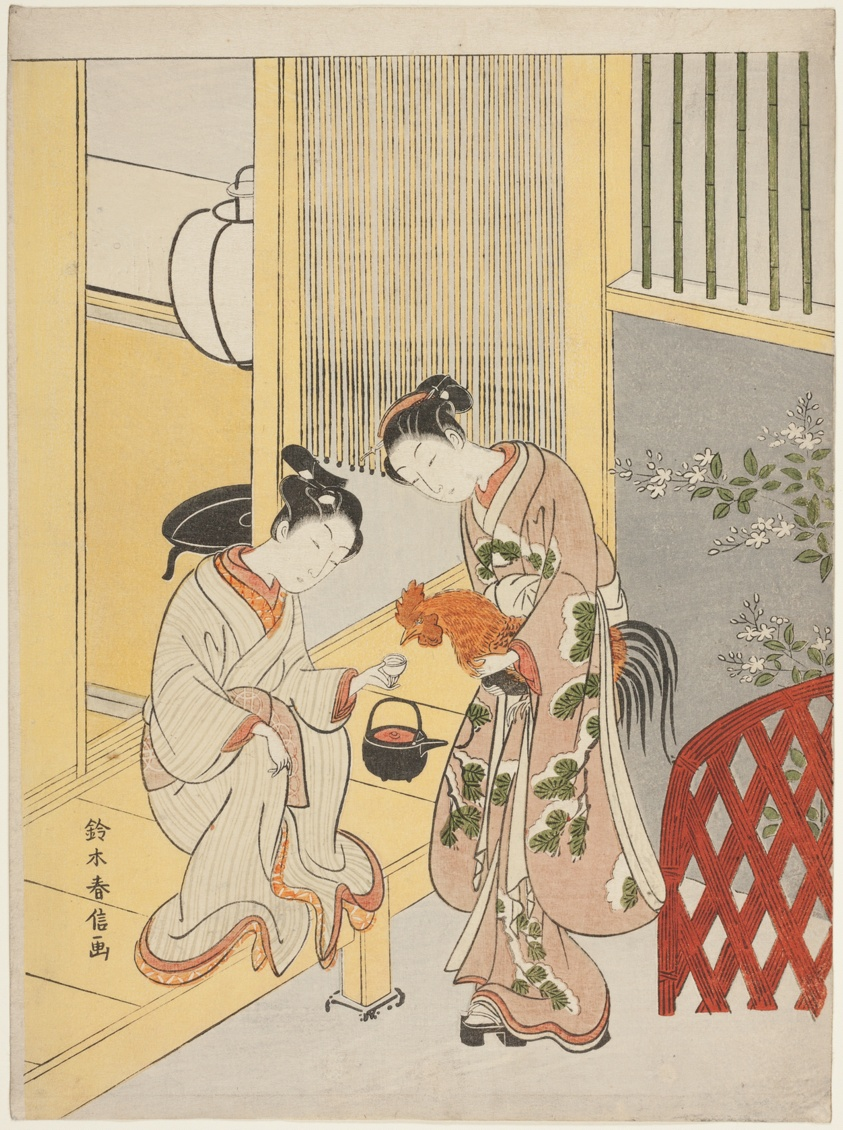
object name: Print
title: Delaying the announcement of dawn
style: Japanese (culture or style)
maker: Suzuki Harunobu 鈴木 春信; Japanese, 1725 (?)-1770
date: c. 1767/68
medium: Color woodblock print; chuban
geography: Japan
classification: woodblock print; print; asian art